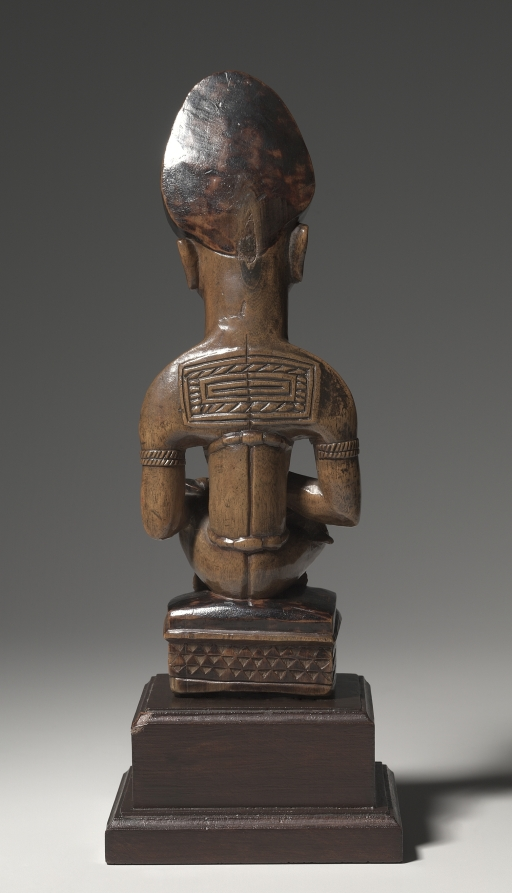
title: Woman and Child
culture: Africa, Central Africa, Democratic Republic of Congo, Yombe-style carver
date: mid- to late 1800s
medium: Wood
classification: Sculpture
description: This mother-and-child figure was probably part of a cult concerned with the treatment of infertility. Both her jewelry and her seated pose indicate that the woman occupied a high rank in her community. Her miter-shaped hairstyle, chiseled teeth, and raised body scars--considered to be marks of beauty and perfection--signal that the woman incarnates the founding ancestor of a kinship group.